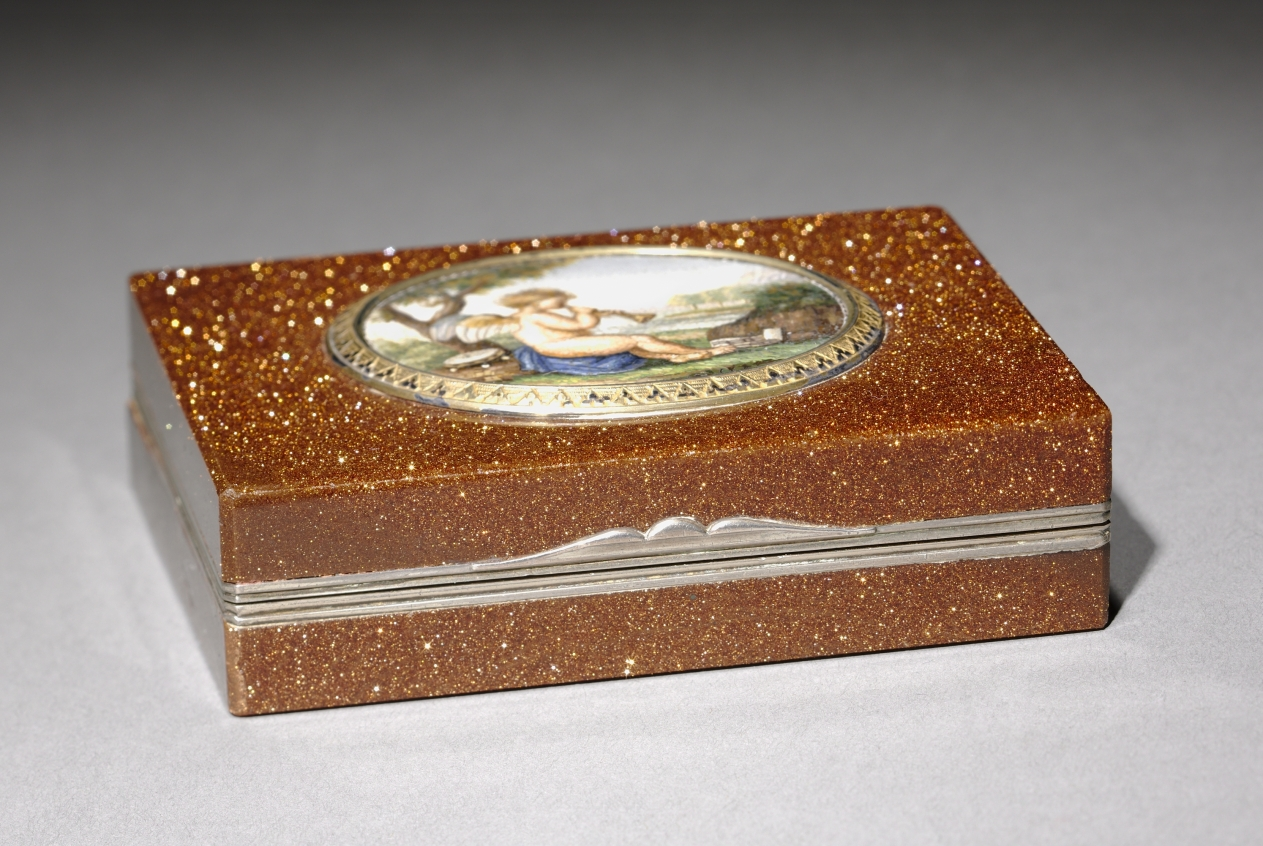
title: Snuff Box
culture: Italy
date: 1860–70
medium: goldstone, gold, micro mosaic glass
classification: Enamel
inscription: no marks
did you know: Hundreds of small glass tesserae make up the central image on the cover of this snuff box.